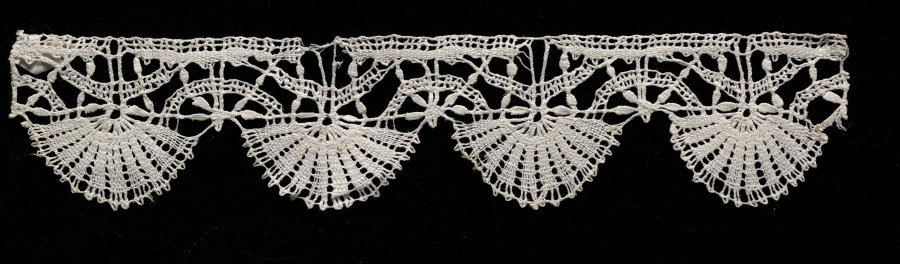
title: Lace Edging of Bell Points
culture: Italy, Genoa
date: 1600s–1700s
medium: Bobbin lace (rose lace)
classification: Lace